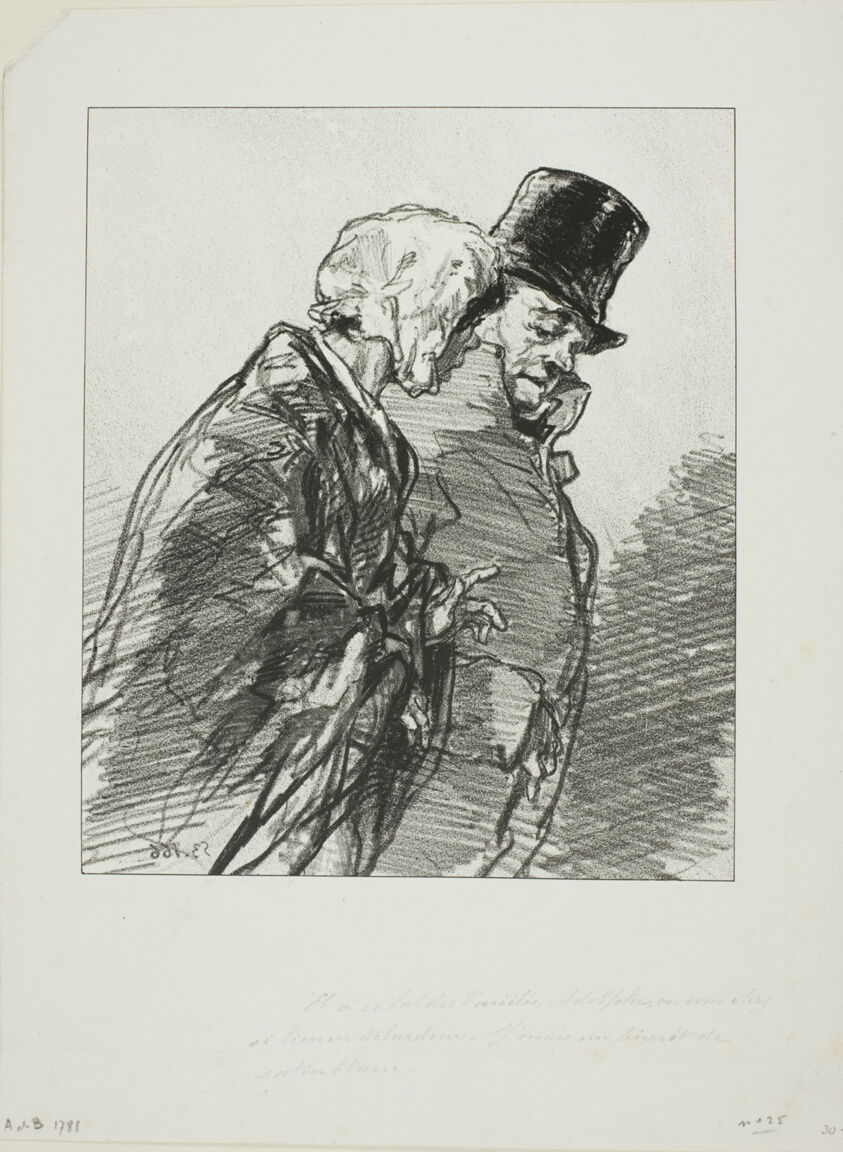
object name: Print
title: Les Lorettes vieillies: ...Et à ce bal des Variétés, Adolphe...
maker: Paul Gavarni (French, 1804-1866)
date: 1852–53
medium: Lithograph in black on ivory wove paper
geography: France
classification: lithograph; print; prints and drawing